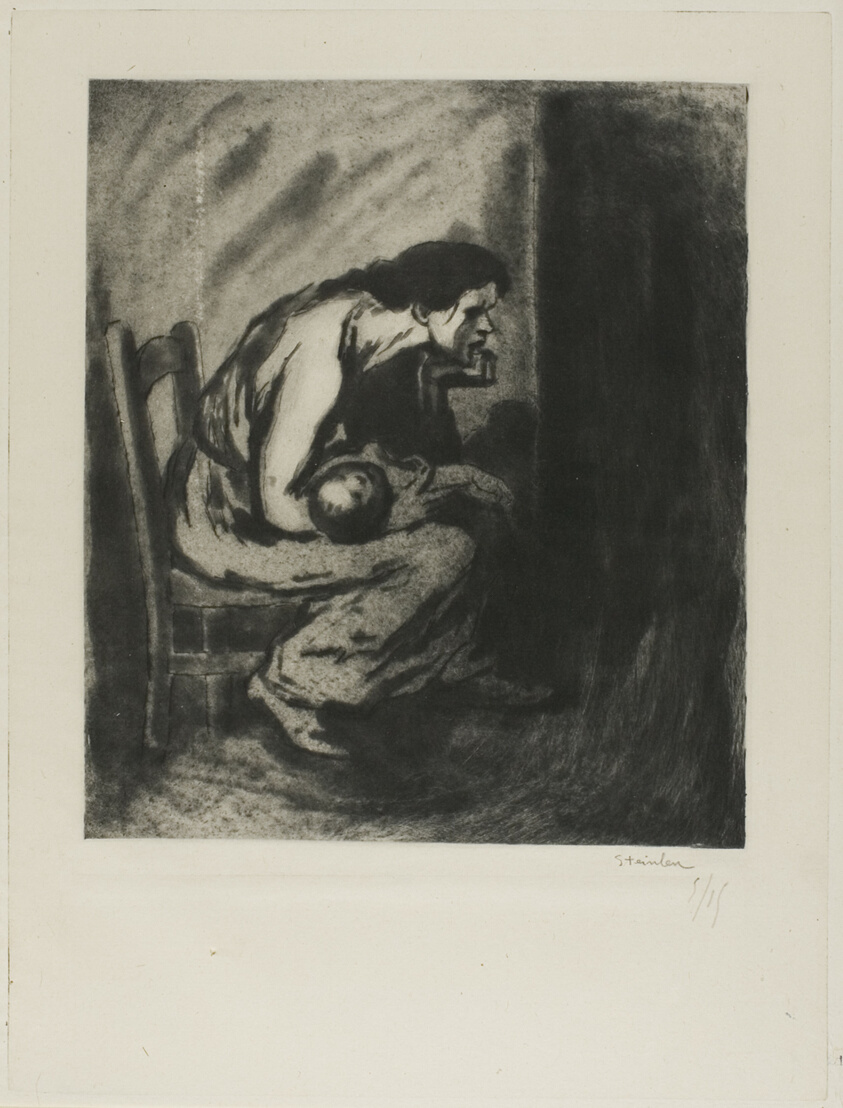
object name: Print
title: The Sick Child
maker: Théophile-Alexandre Steinlen; French, born Switzerland, 1859-1923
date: 1902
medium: Soft ground etching and etching from a zinc plate on grayish-ivory China paper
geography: France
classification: etching; print; prints and drawing